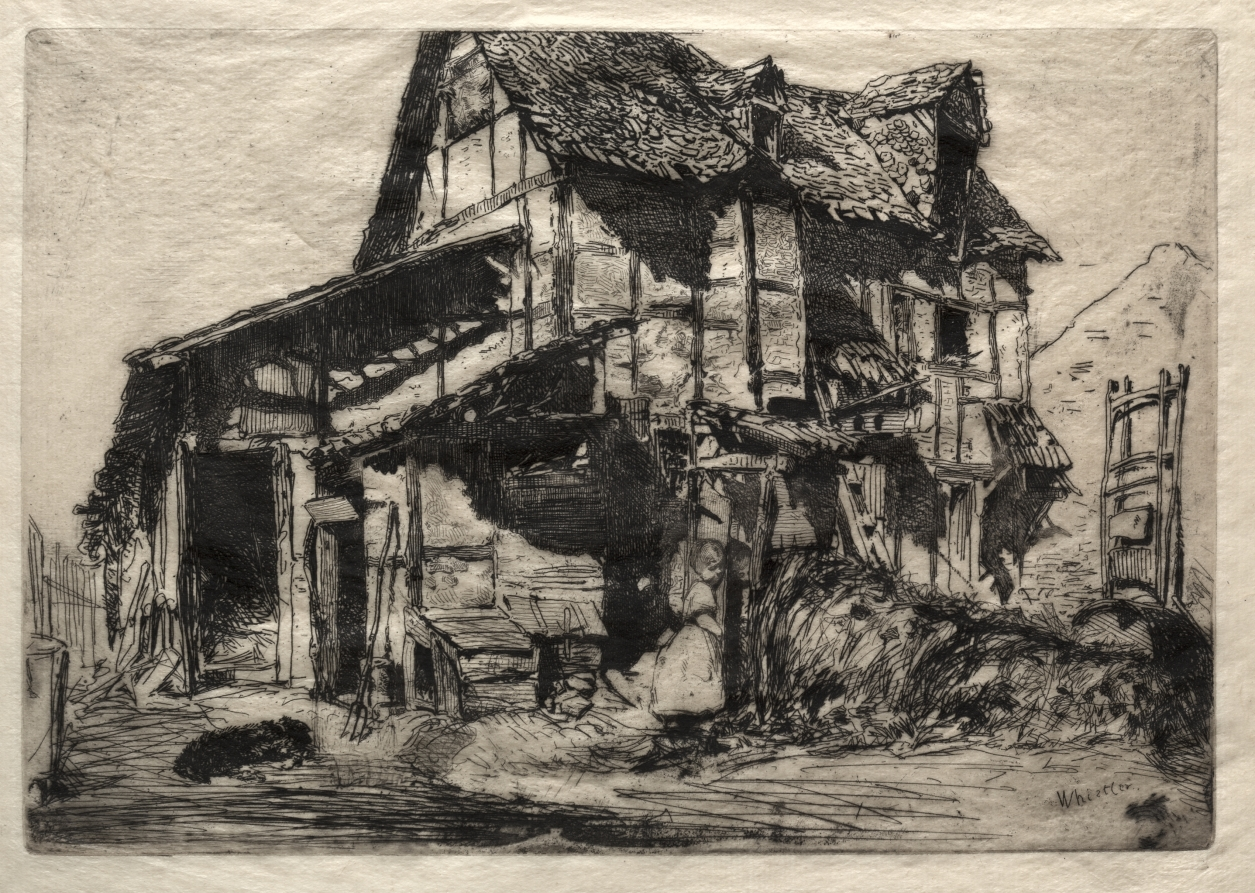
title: The Unsafe Tenement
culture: America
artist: James McNeill Whistler (American, 1834–1903)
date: 1858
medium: etching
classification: Print